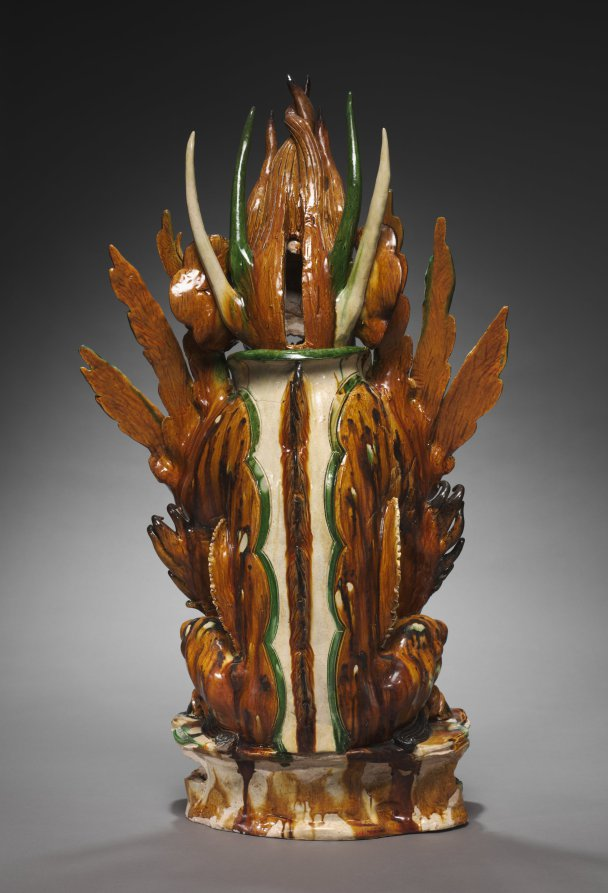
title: Tomb Guardian with Human Face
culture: China, probably Shaanxi province, Xi'an, Tang dynasty (618-907)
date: early 700s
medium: glazed earthenware, sancai (three-color) ware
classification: Ceramic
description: With their fierce expressions and exaggerated physical features, these two fantastic guardian creatures were intended to guard the entrance to a tomb, warding off evil as well as keeping the soul of the deceased from wandering. Known as "earth spirits" or qitou, this one sports a human face with huge protruding ears and a short horn surrounded by fiery, twisting hair; the other has an animal face and a pair of antlers growing above its eyebrows. Their many elongated spikes heighten the fearful intensity. Before tomb sculptures were placed in the tomb, they were carried through the streets in a funerary procession. Funerary gifts provided the deceased with means for the afterlife. They were also an expression of filial piety and demonstrated the wealth and power of the descendants.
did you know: Cobalt blue glaze used on the head and chest was imported from the Middle East.